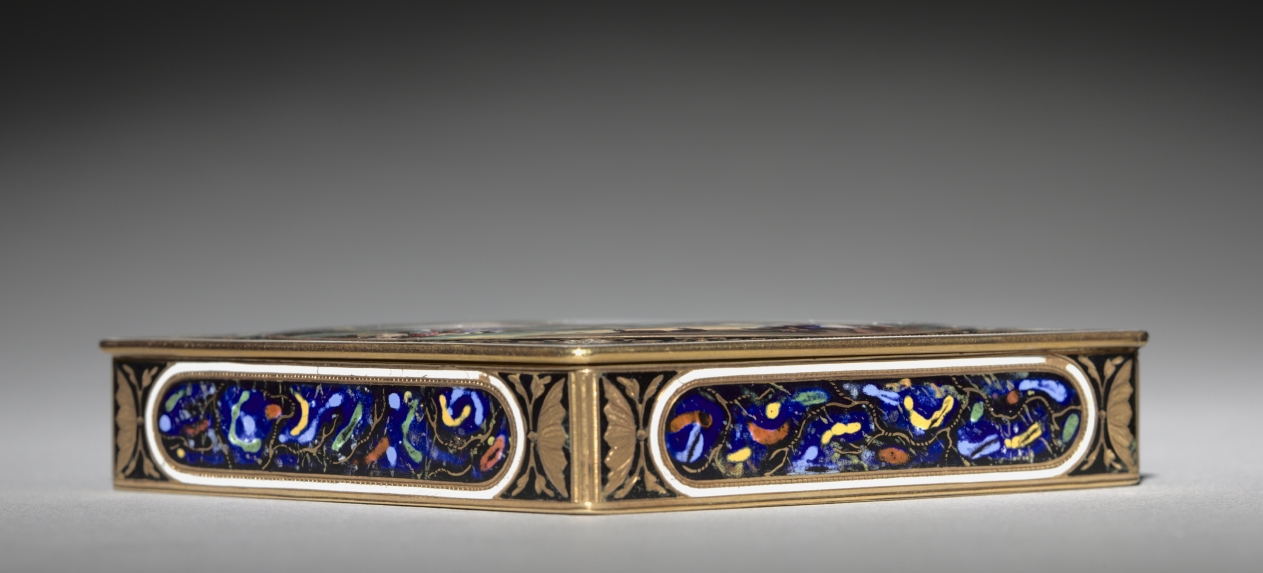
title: Box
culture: Switzerland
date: early 1800s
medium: gold and enamel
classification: Enamel